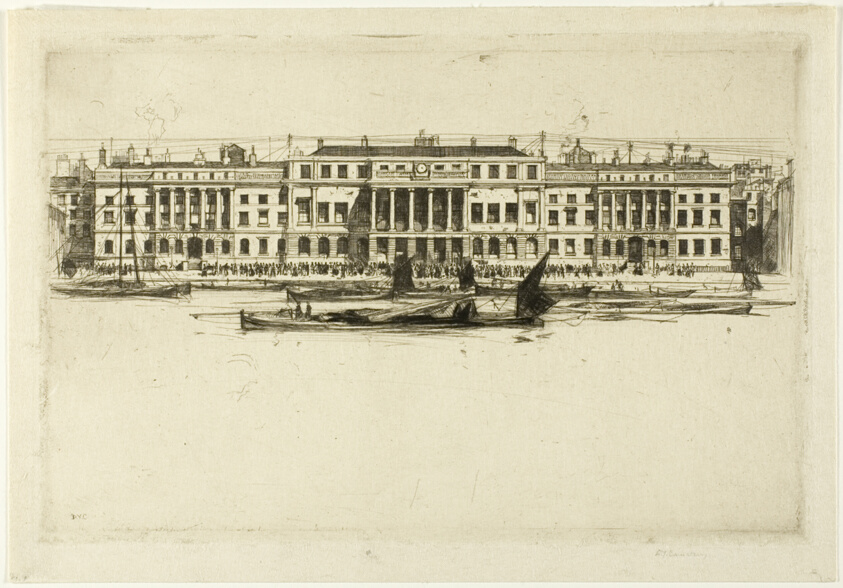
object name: Print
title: Custom House, plate one from the London Set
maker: David Young Cameron (Scottish, 1865-1945)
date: 1899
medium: Etching and drypoint on ivory laid paper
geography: Scotland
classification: etching; print; prints and drawing